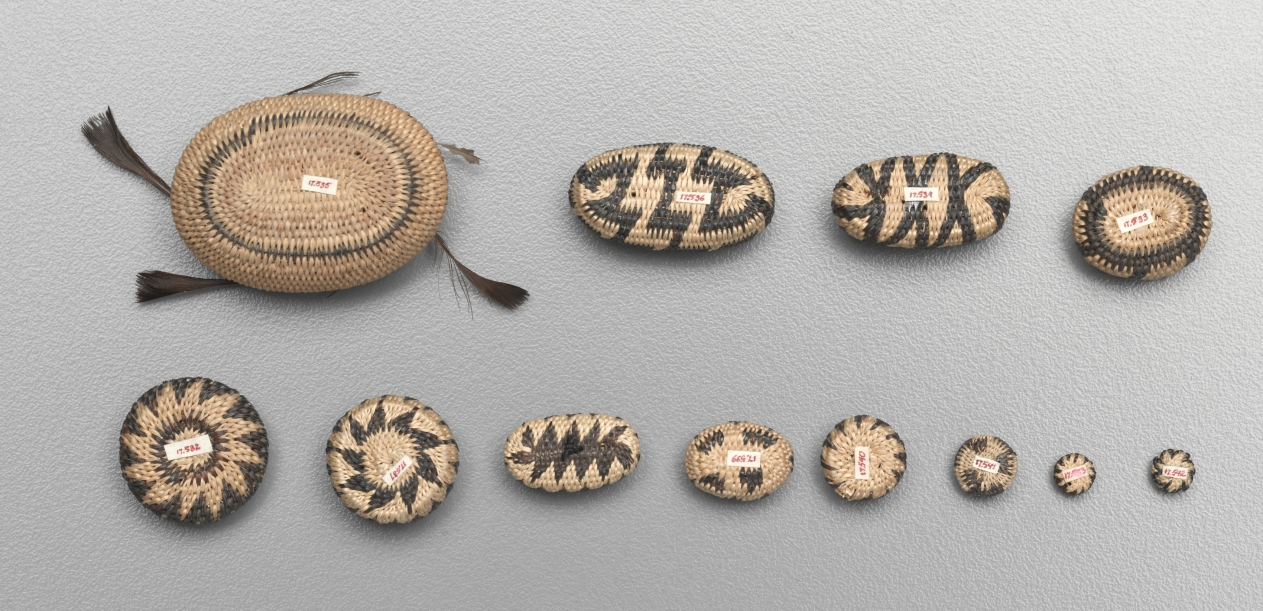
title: Miniature Round Basket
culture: California, Pomo, late 19th-early 20th century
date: late 1800s-early 1900s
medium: plant materials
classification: Basketry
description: Miniature baskets were made to demonstrate the basket-maker’s virtuoso skill, and these tiny marvels seem to be no exception -- the smallest are just a few millimeters wide but still patterned. For such fine work, dexterity was required as much for preparation of materials as for weaving.